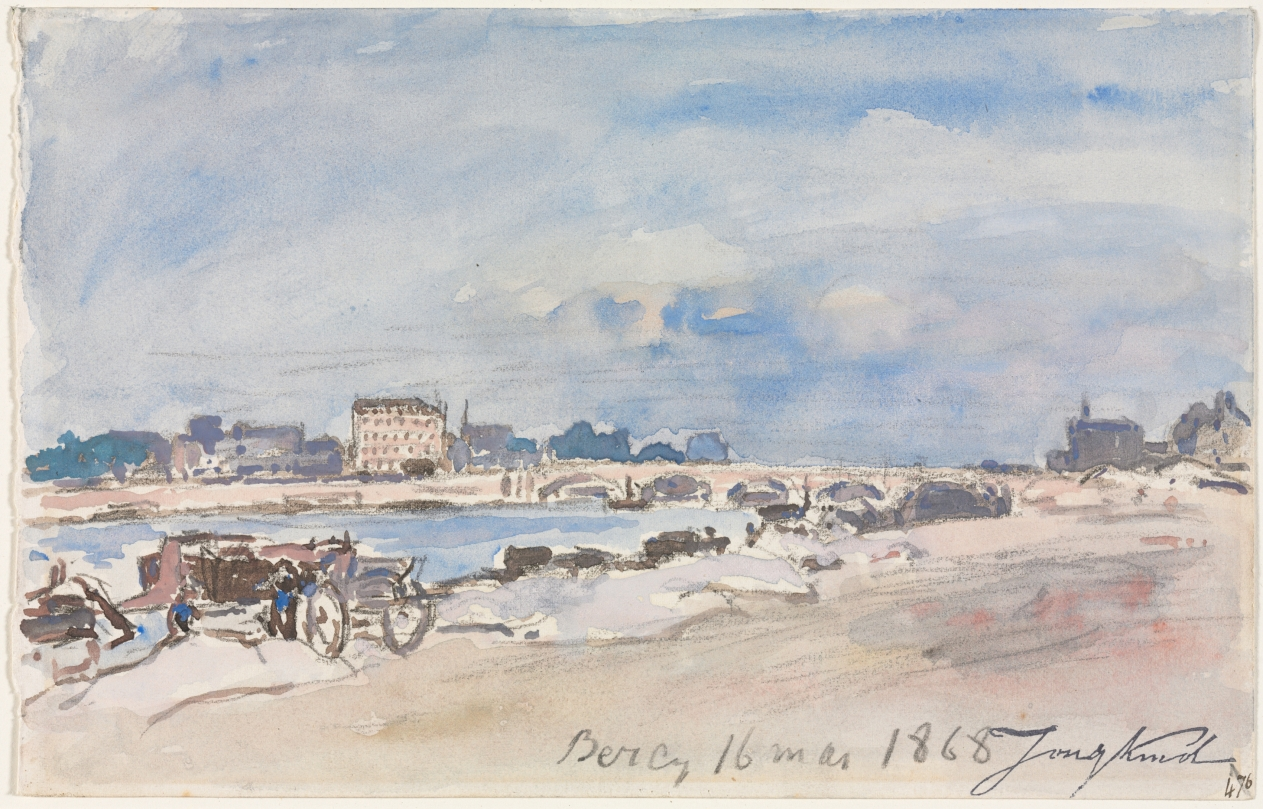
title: Bercy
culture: Netherlands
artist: Johan Barthold Jongkind (Dutch, 1819–1891)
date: 1868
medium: watercolor and gouache over black chalk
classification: Drawing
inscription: by artist, lower center, in black chalk: Bercy 16 mai 1868 ; lower right, in brown ink: 476 ; lower right, in graphite: 1 [written over the 476]